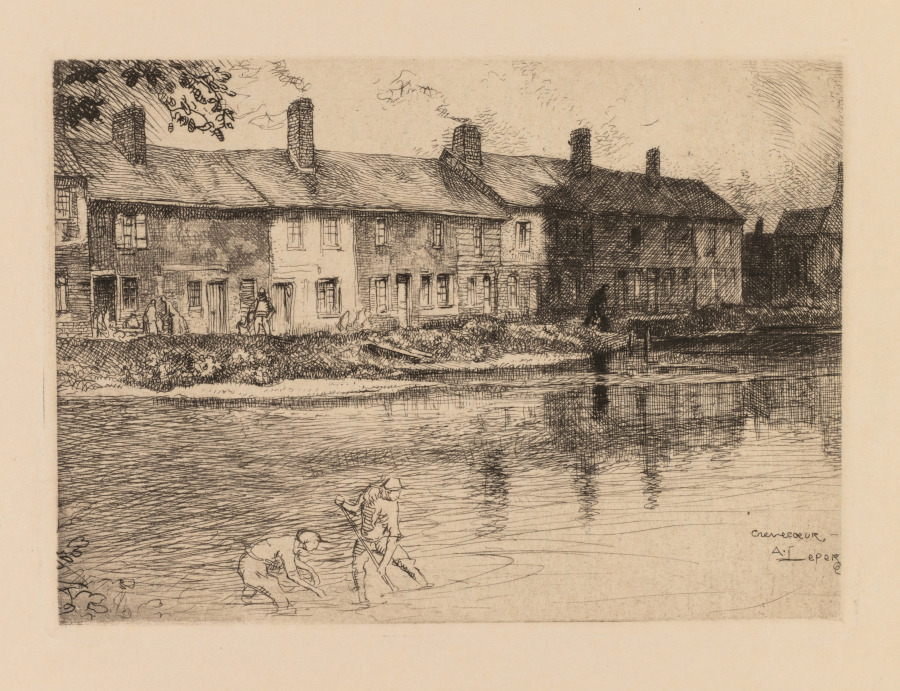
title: Auguste Lepère: La mare de la prairie à Crèvecoeur (Picardie)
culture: France, 20th century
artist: Auguste Louis Lepère (French, 1849–1918)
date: 1931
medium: Etching, from bound volume with seven etchings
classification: Bound Volume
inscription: On tissue guard, lower right: 404. LA MARE DE LA PRAIRIE A CRÉVECOEUR (PICARDIE); On plate, within image, lower left margin: Crevecoeur / A. Lepère / e